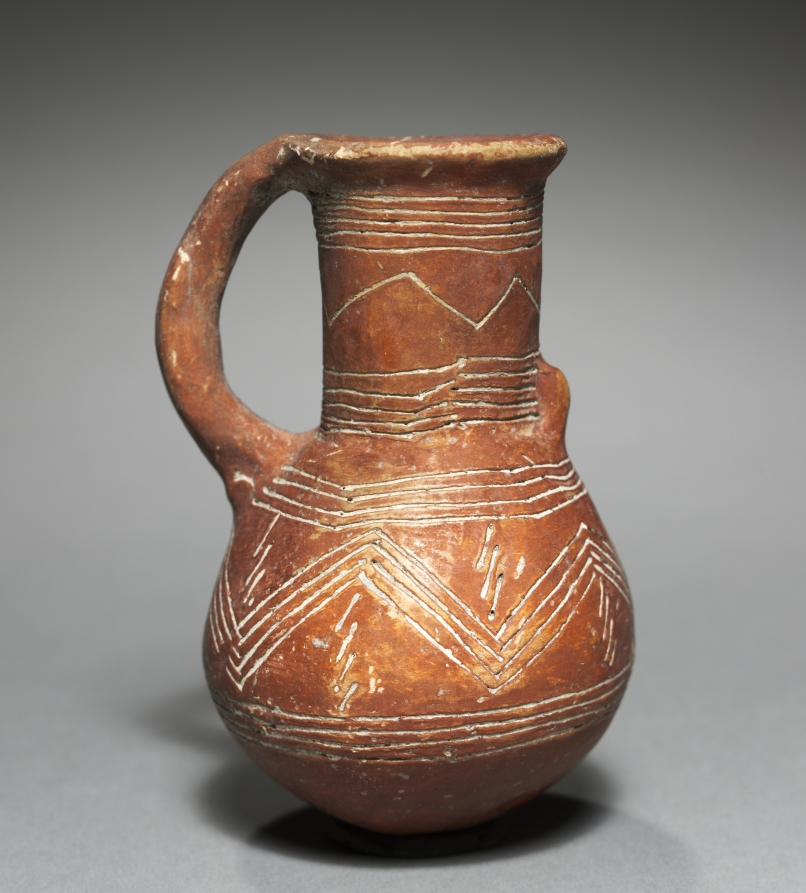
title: Jug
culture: Cyprus, early Cypriot III-middle Cypriot II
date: 2000–1800 BCE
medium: red ware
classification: Ceramic